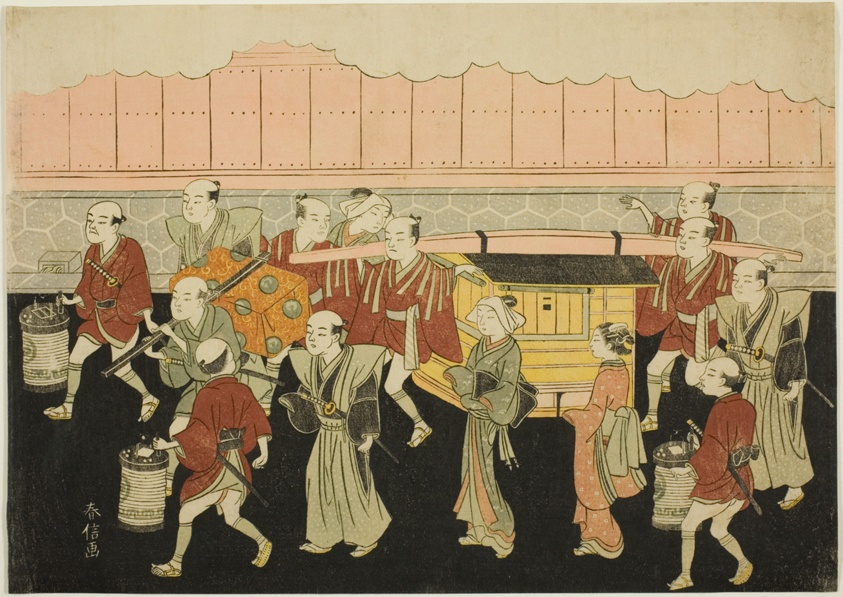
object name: Print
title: The Bride Riding in the Palanquin to Her Husband's House (Koshi-iri), the third sheet of the series "Marriage in Brocade Prints, the Carriage of the Virtuous Woman (Konrei nishiki misao-guruma)"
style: Japanese (culture or style)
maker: Suzuki Harunobu 鈴木 春信; Japanese, 1725 (?)-1770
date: c. 1769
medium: Color woodblock print; chuban yoko-e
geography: Japan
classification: woodblock print; print; asian art